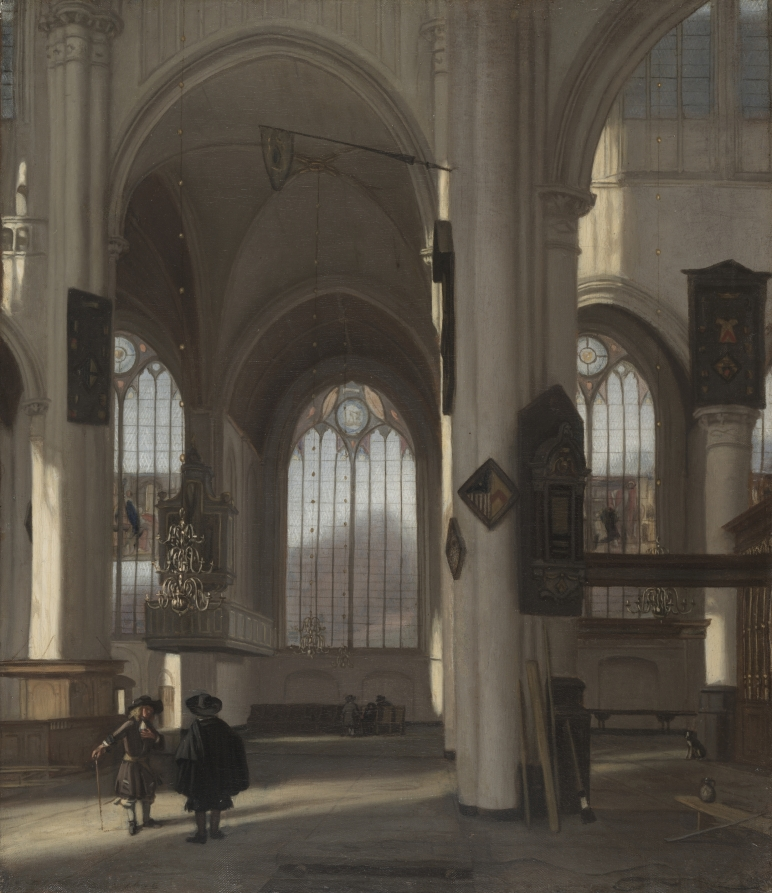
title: Interior of a Church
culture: Netherlands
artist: Emanuel de Witte (Dutch, c. 1617–1692)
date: c. 1680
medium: oil on canvas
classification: Painting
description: Although this spacious church interior is largely imaginary, Emanuel de Witte’s precise description of architectural forms convinces us that he depicted an actual place. To create a sense of familiarity, he included some specific architectural features from the Oude Kerk (Old Church) in Amsterdam. In the late 1500s, militant Protestant sects occupied Catholic churches in the Netherlands and stripped them of rich decorations and “idolatrous” images. The resulting spare, whitewashed interiors became a favorite subject of Dutch artists, who were intrigued by the interplay of light and shadow over the unadorned walls, and by the challenge of depicting perspectival space.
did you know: In the 1600s, Dutch churches functioned as public gathering places—even dogs were allowed!